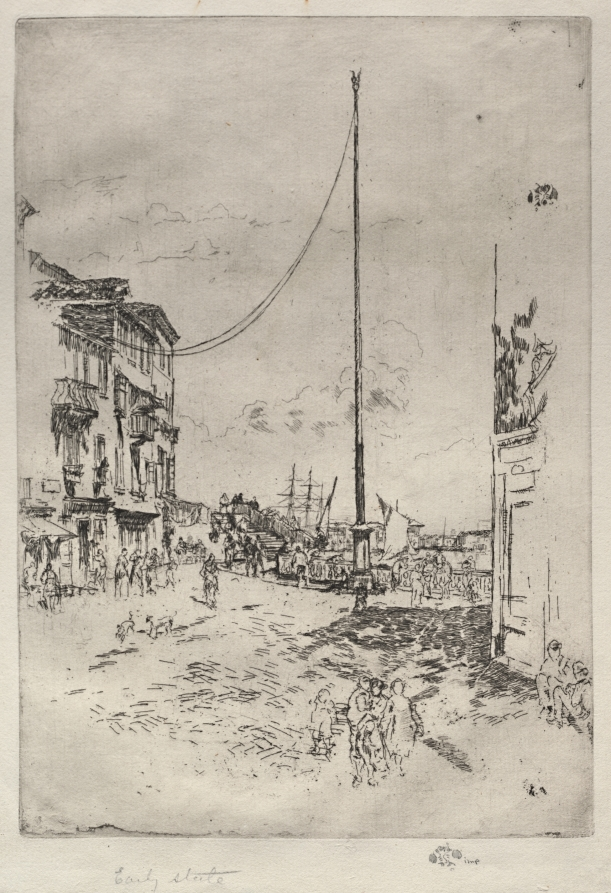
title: The Little Mast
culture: America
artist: James McNeill Whistler (American, 1834–1903)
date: 1880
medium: etching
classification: Print